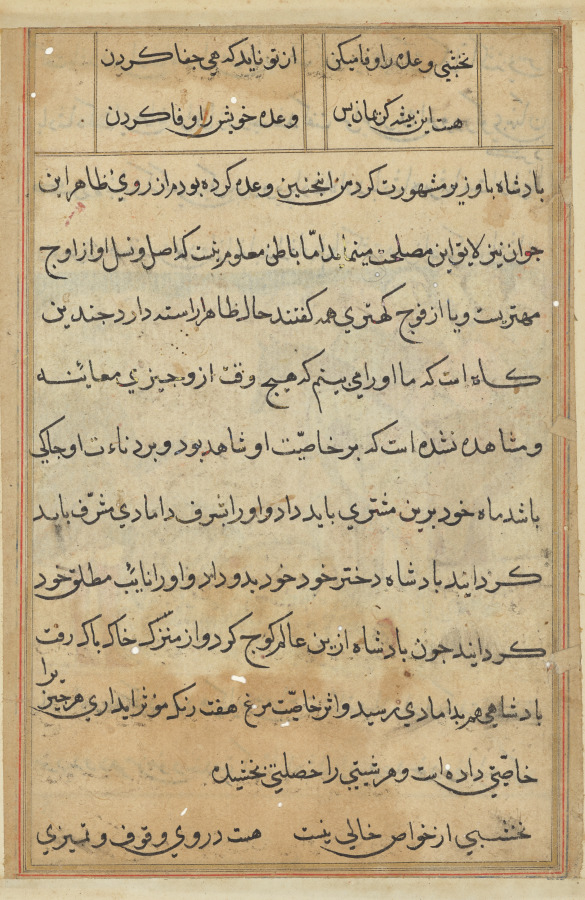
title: Page from Tales of a Parrot (Tuti-nama): text page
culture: Mughal India, court of Akbar (reigned 1556–1605)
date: c. 1560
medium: gum tempera, ink, and gold on paper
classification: Painting